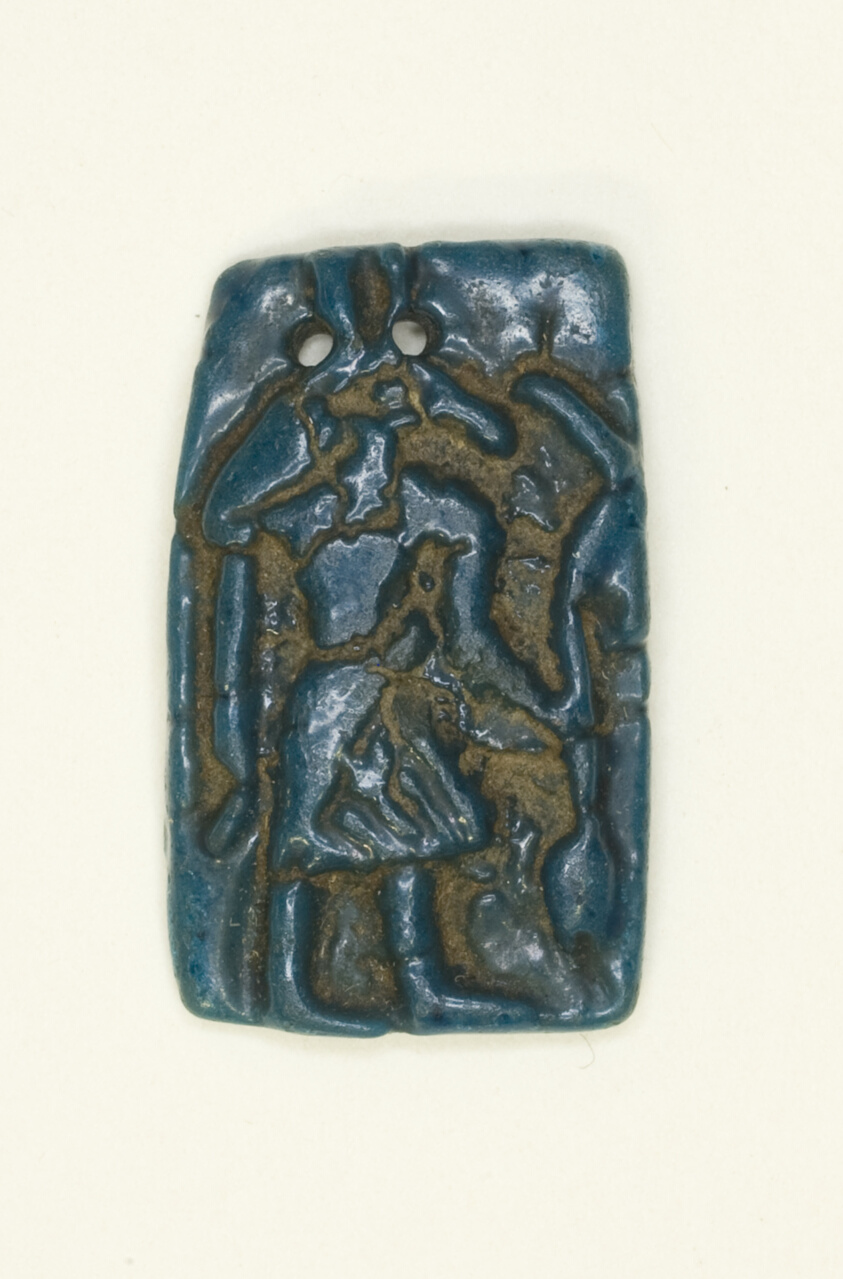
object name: Costume and Accessories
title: Amulet of the God Seth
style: egyptian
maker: Egyptian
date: Third Intermediate Period, Dynasties 21–25 (about 1069–664 BCE)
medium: Faience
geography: Egypt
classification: amulet; jewelry; enamel; ancient art; costume; faïence (composite material)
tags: gods (deities)